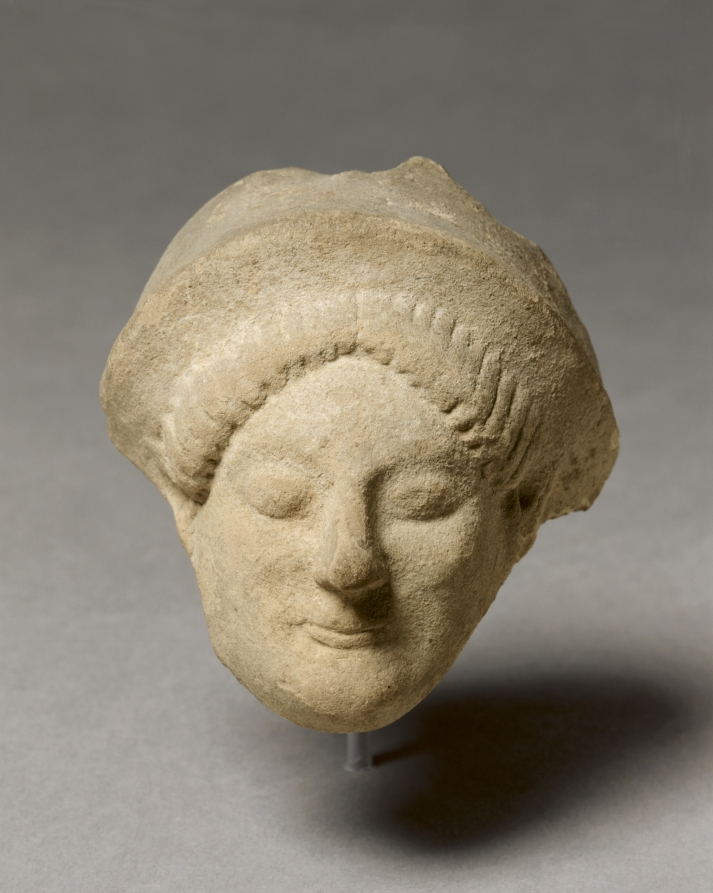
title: Archaic Mask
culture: Greek, Sicily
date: 500s BCE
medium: terracotta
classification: Sculpture